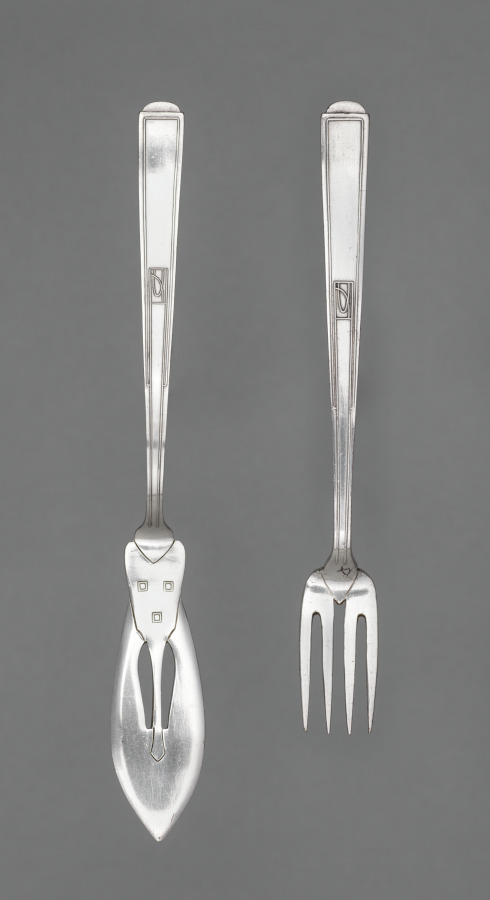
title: Fish Knife and Fork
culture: Germany, late 19th-early 20th Century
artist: Josef Maria Olbrich (German, 1867–1908)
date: c. 1900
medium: silver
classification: Silver